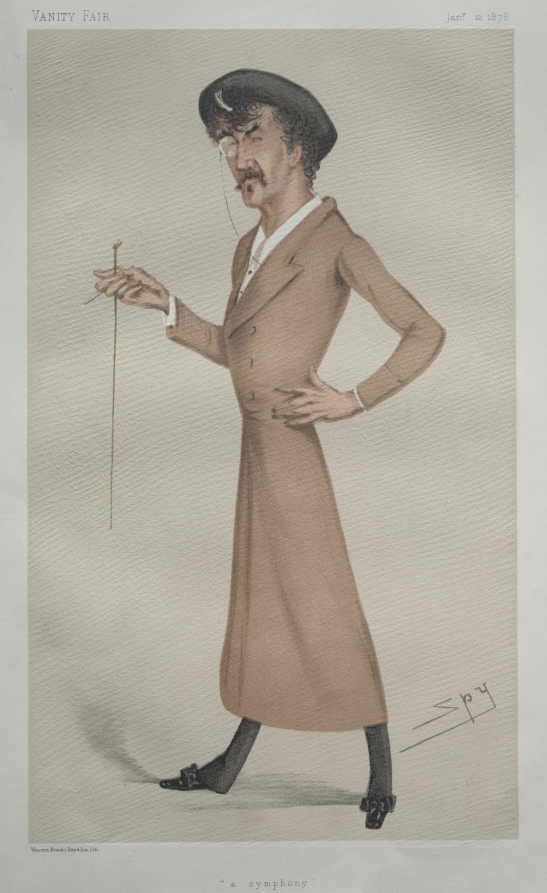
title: A Symphony (Whistler)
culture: England, 19th century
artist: Leslie Matthew (Spy) Ward (British, 1851–1922)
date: 1878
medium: lithograph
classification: Print